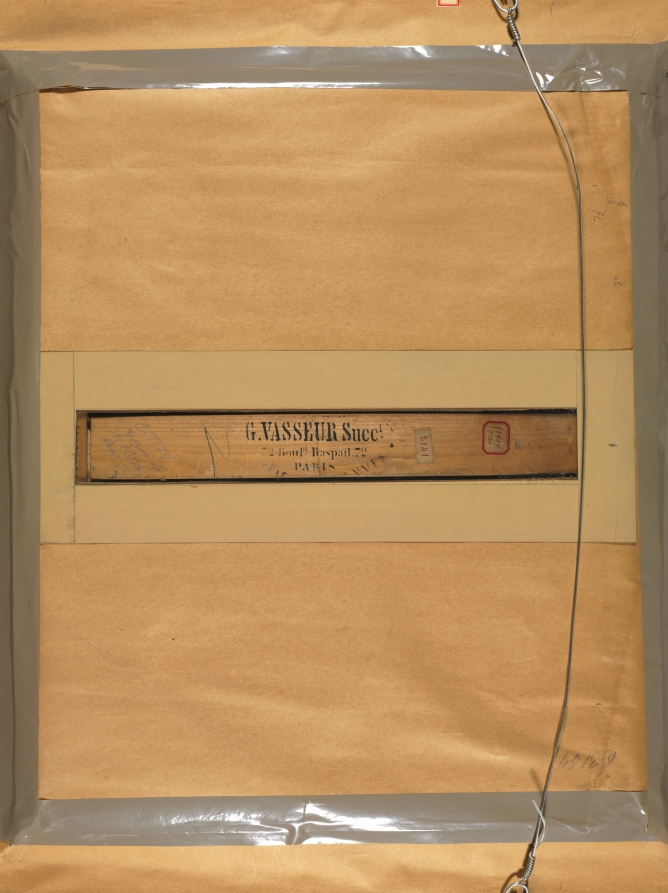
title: Canal in Autumn (Gisors)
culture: France, early 20th century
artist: Henri Le Sidaner (French, 1862–1939)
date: 1913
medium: oil on canvas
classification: Painting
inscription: Distinguishing marks on canvas face: signed with green painting in the lower left: "Le Sidaner"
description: This painting depicts a canal in Gisors, a commune in Normandy, about 40 miles northwest of Paris on the river Epte. Le Sidaner painted this work in a Divisionist technique of applying pure color in large, broken strokes, often separated by areas of white or gray. Unlike the Impressionists, Le Sidaner preferred a restrained palette of delicately nuanced tones that evoke a mood of quiet mystery. His views of old canals, typically portrayed in a crepuscular or nocturnal light, and completely absent of figures, allude to the passage of time and a timeless eternity that exceeds the human life span.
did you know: Le Sidaner often painted from memory rather than directly on site, and his subdued use of color applied in uneven brushstrokes bring a poetic, dreamlike effect to his paintings.